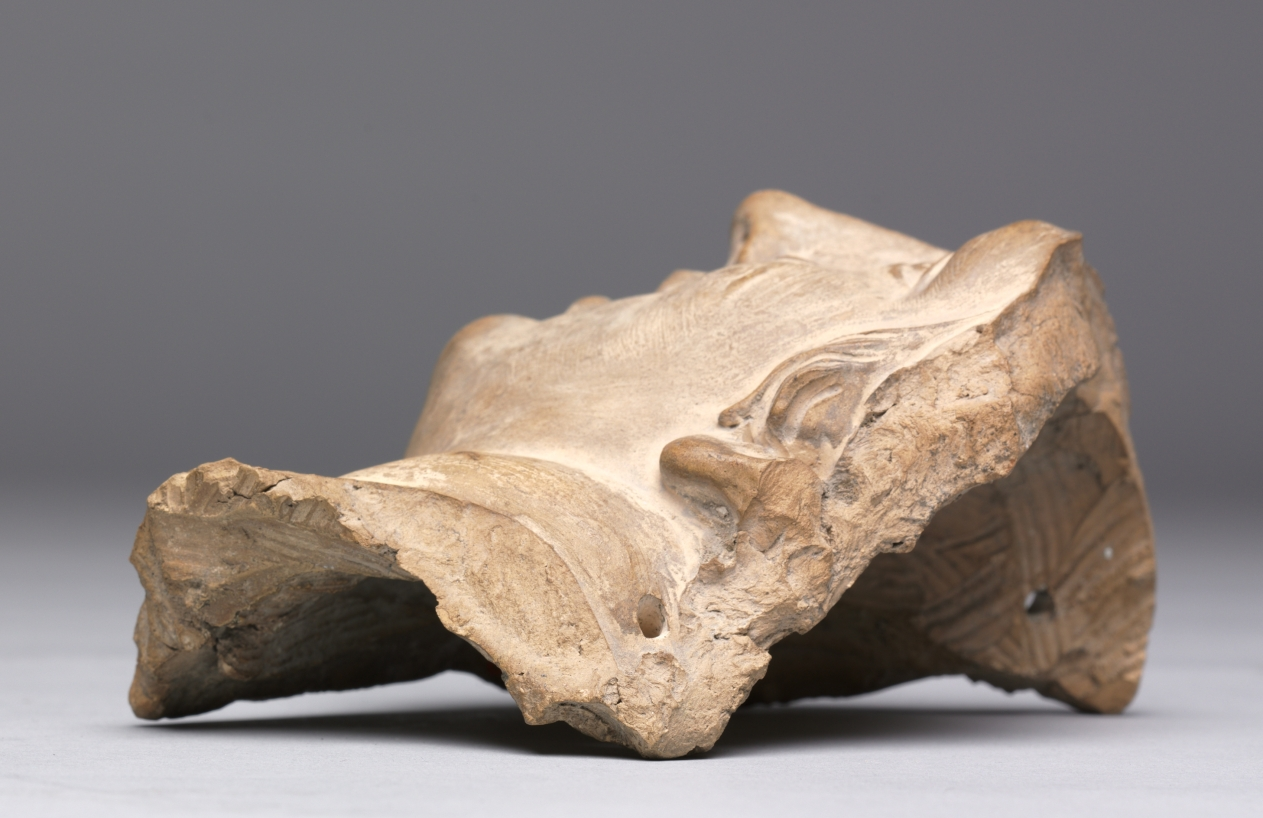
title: Head of Proserpina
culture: Italy, 17th century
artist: after Gian Lorenzo Bernini (Italian, 1598–1680)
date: 1650– 1700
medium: terracotta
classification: Sculpture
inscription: penciled inscription on neck: "Palazzo Bernini / 1839"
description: This work was long thought to be a fragment of a preliminary study for a large-scale marble sculpture by Gian Lorenzo Bernini in Rome depicting Pluto, the god of the underworld, dragging Proserpina away to be his wife. Bernini’s finished studies never had the scrape marks visible on the cheek, indicating another sculptor’s hand. The work was owned by Bernini’s family, and his many studio assistants often copied his work. This terracotta therefore may be by one of the more significant sculptors of this group. The subject conveys fleeting expressions of sadness, fear, and surprise, and would have interested sculptors learning to convey complex emotions.